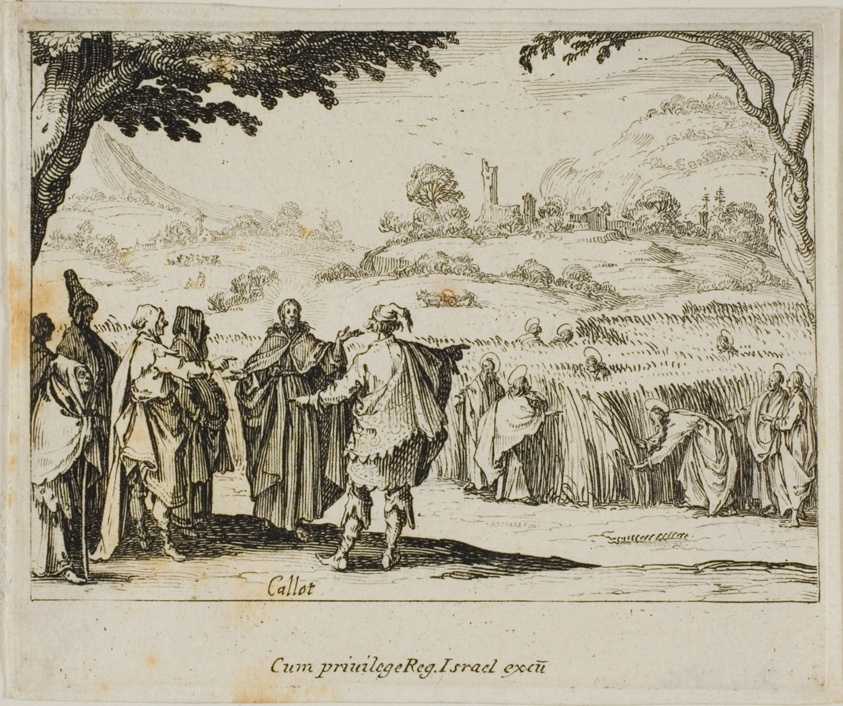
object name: Print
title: Jesus with the Pharisees, from The New Testament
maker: Jacques Callot (French, 1592-1635); published by Israël Henriet (French, 1590-1661)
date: 1635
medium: Etching on paper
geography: France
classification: etching; print; prints and drawing